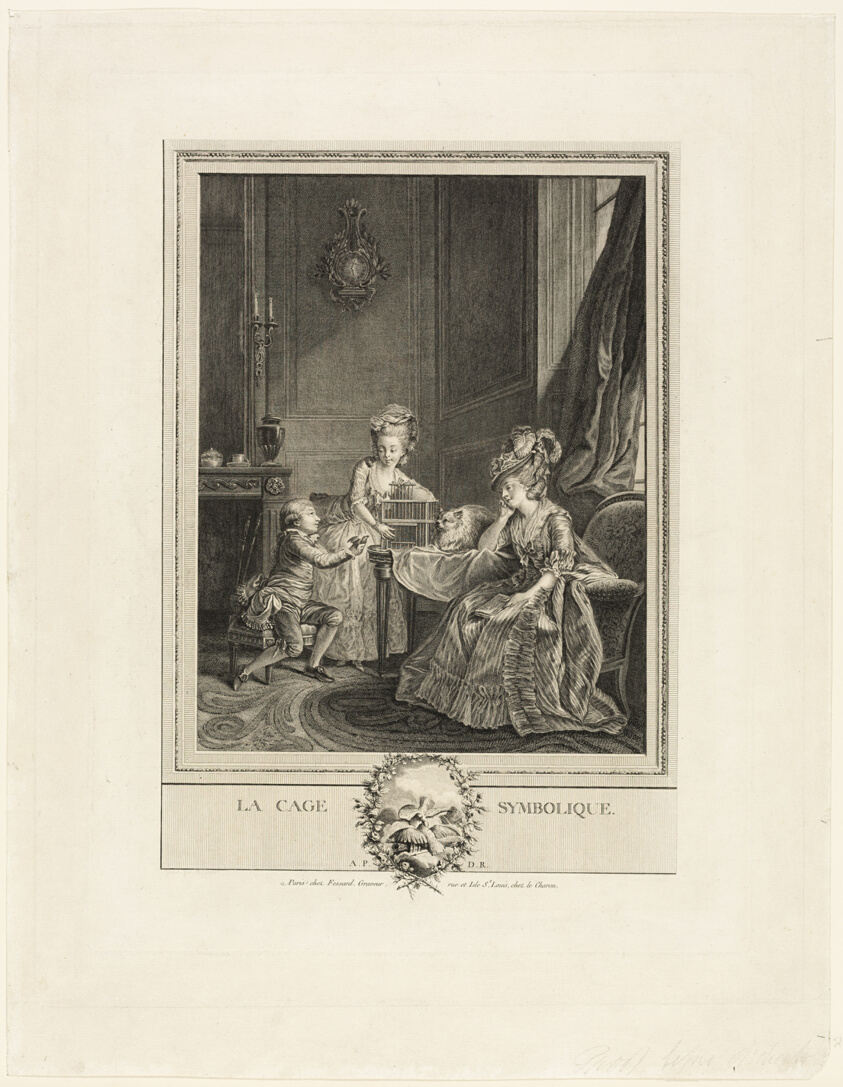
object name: Print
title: Symbolic Cage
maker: Étienne Fessard; French, 1714-1777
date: 1760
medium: Etching on paper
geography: France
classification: etching; print; prints and drawing